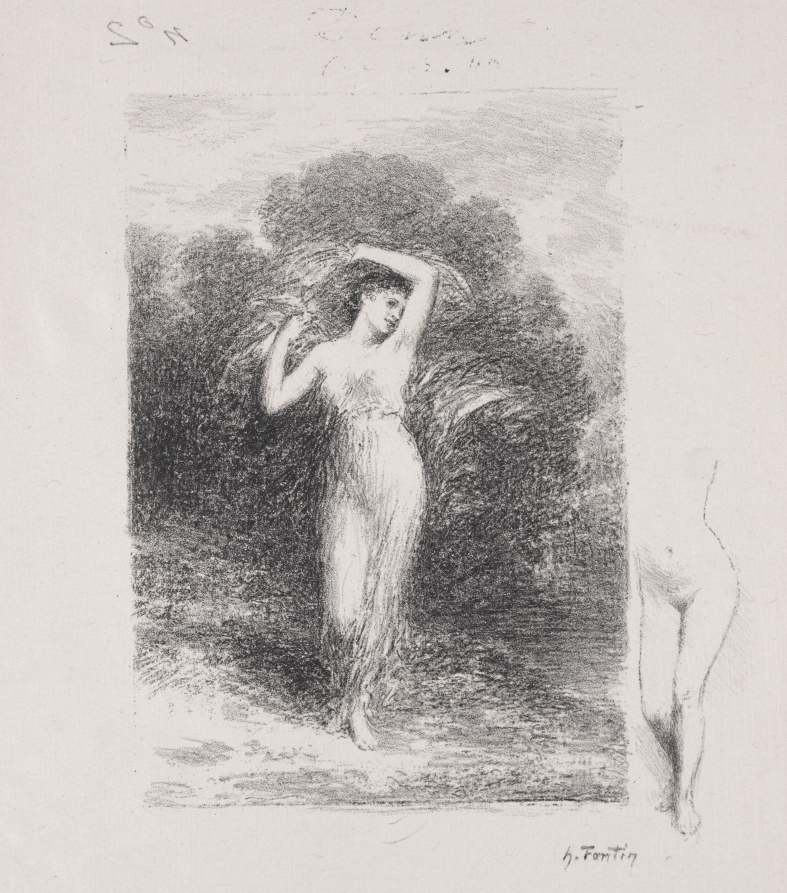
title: La jeune malade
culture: France, 19th century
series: Illustrations for the Poems of André Chénier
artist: Henri Fantin-Latour (French, 1836–1904)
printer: Auguste Clot (French, 1858–1936)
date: 1903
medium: lithograph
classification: Print